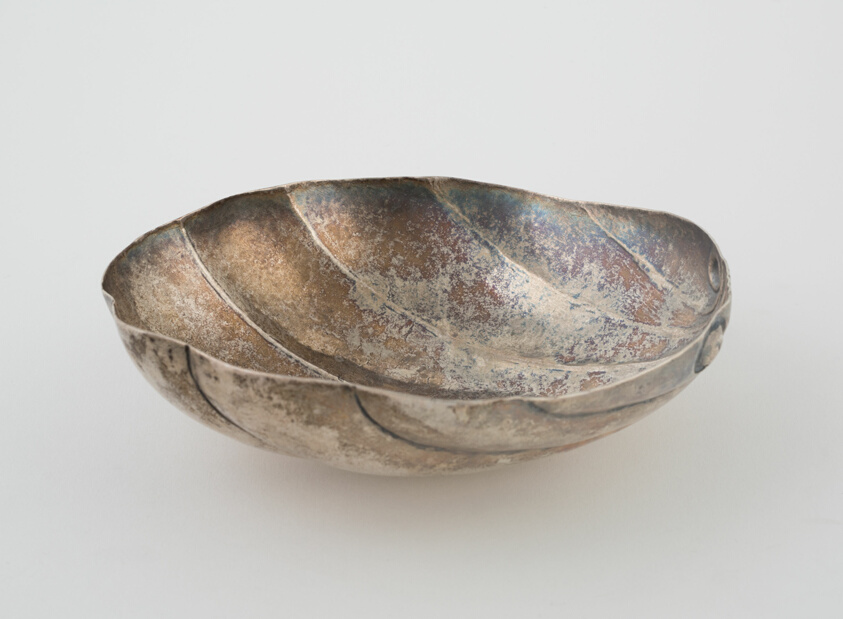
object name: Metalwork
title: Baptismal Shells (3)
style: spanish colonial, european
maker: Mexico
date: 16th to 18th century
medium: Silver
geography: Mexico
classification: silver; metalwork; european decorative arts